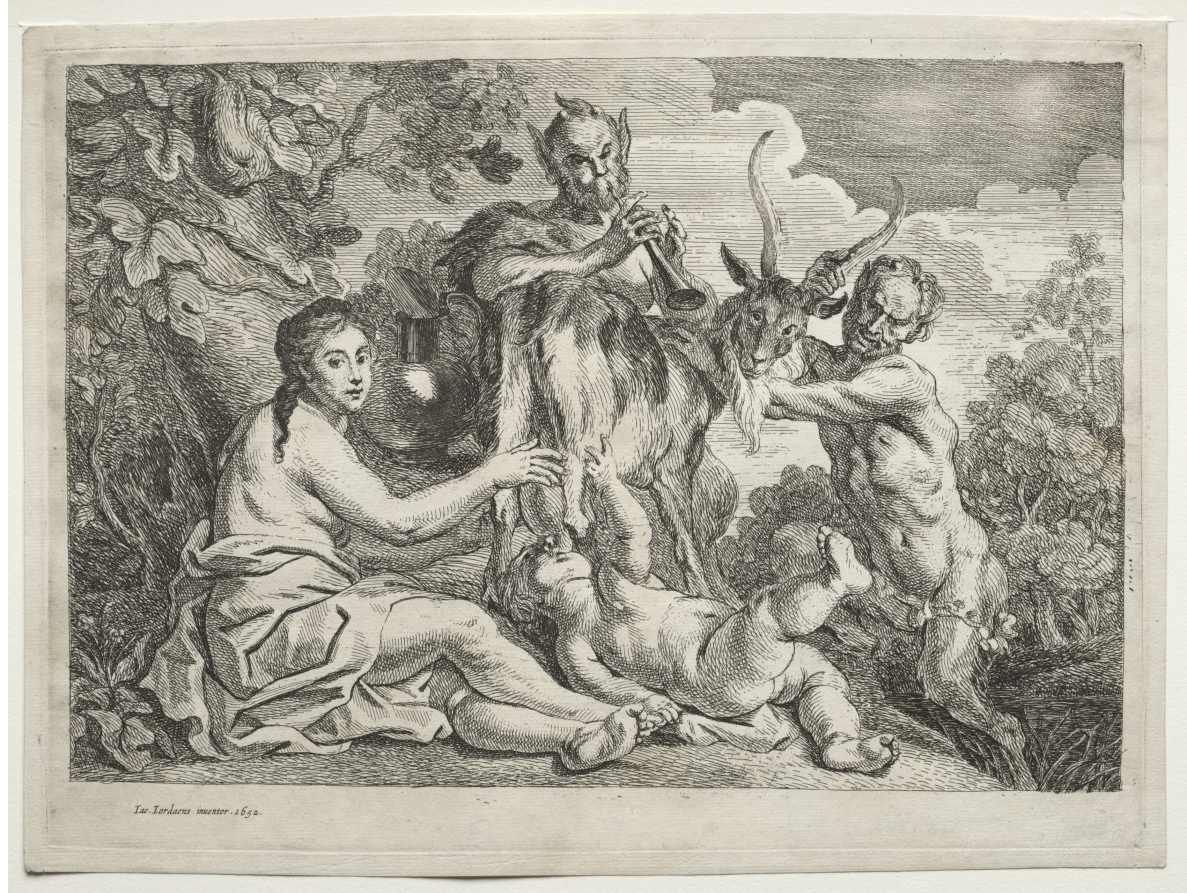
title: Jupiter Nourished by the Goat Almathea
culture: Flanders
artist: Jacob Jordaens (Flemish, 1593–1678)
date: 1652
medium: etching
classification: Print